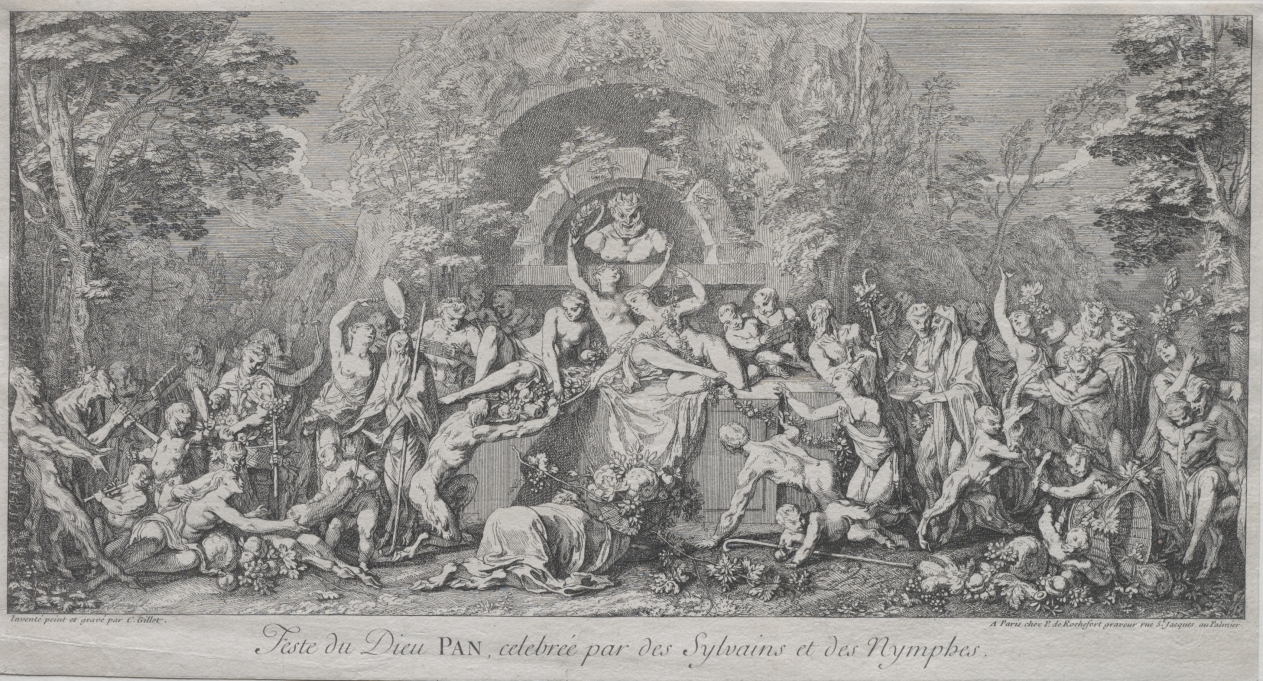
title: The Four Festivals: Festival of the God Pan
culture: France, 18th century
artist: Claude Gillot (French, 1673–1722)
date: c. 1693–1715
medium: etching and engraving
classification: Print